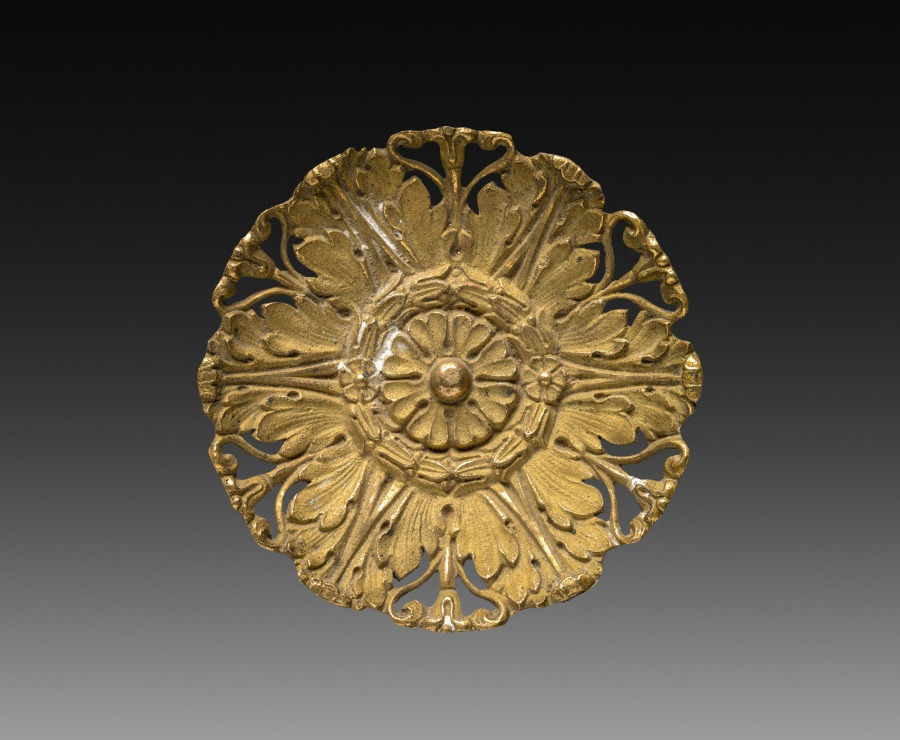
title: Ornamental Detail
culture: France, 18th century, Period of Louis XVI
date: 1775–1799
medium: gilt bronze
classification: Metalwork